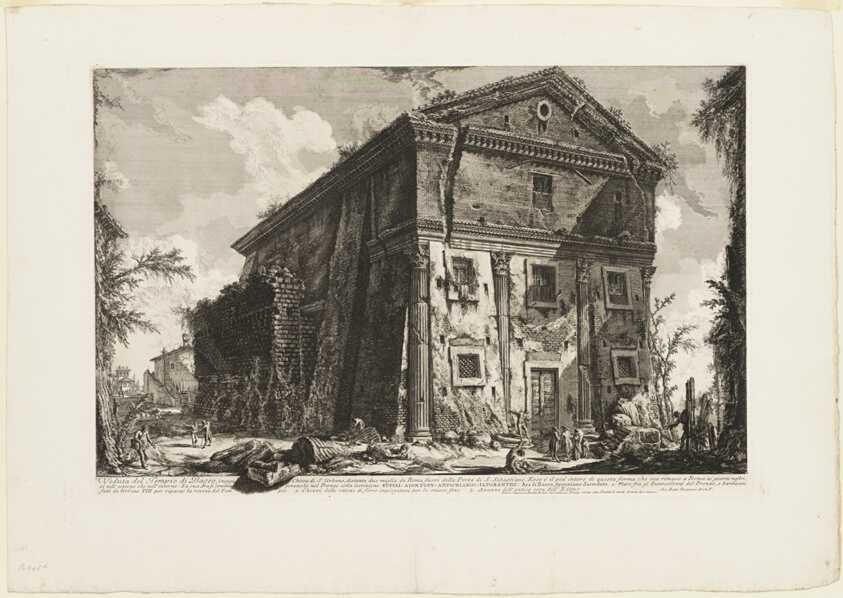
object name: Print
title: View of the Temple of Bacchus, now the church of S. Urbano, two miles distant from Rome, beyond the Porta S. Sebastiano, from Views of Rome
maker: Giovanni Battista Piranesi (Italian, 1720-1778)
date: 1750/59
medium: Etching on heavy ivory laid paper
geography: Italy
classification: etching; print; prints and drawing